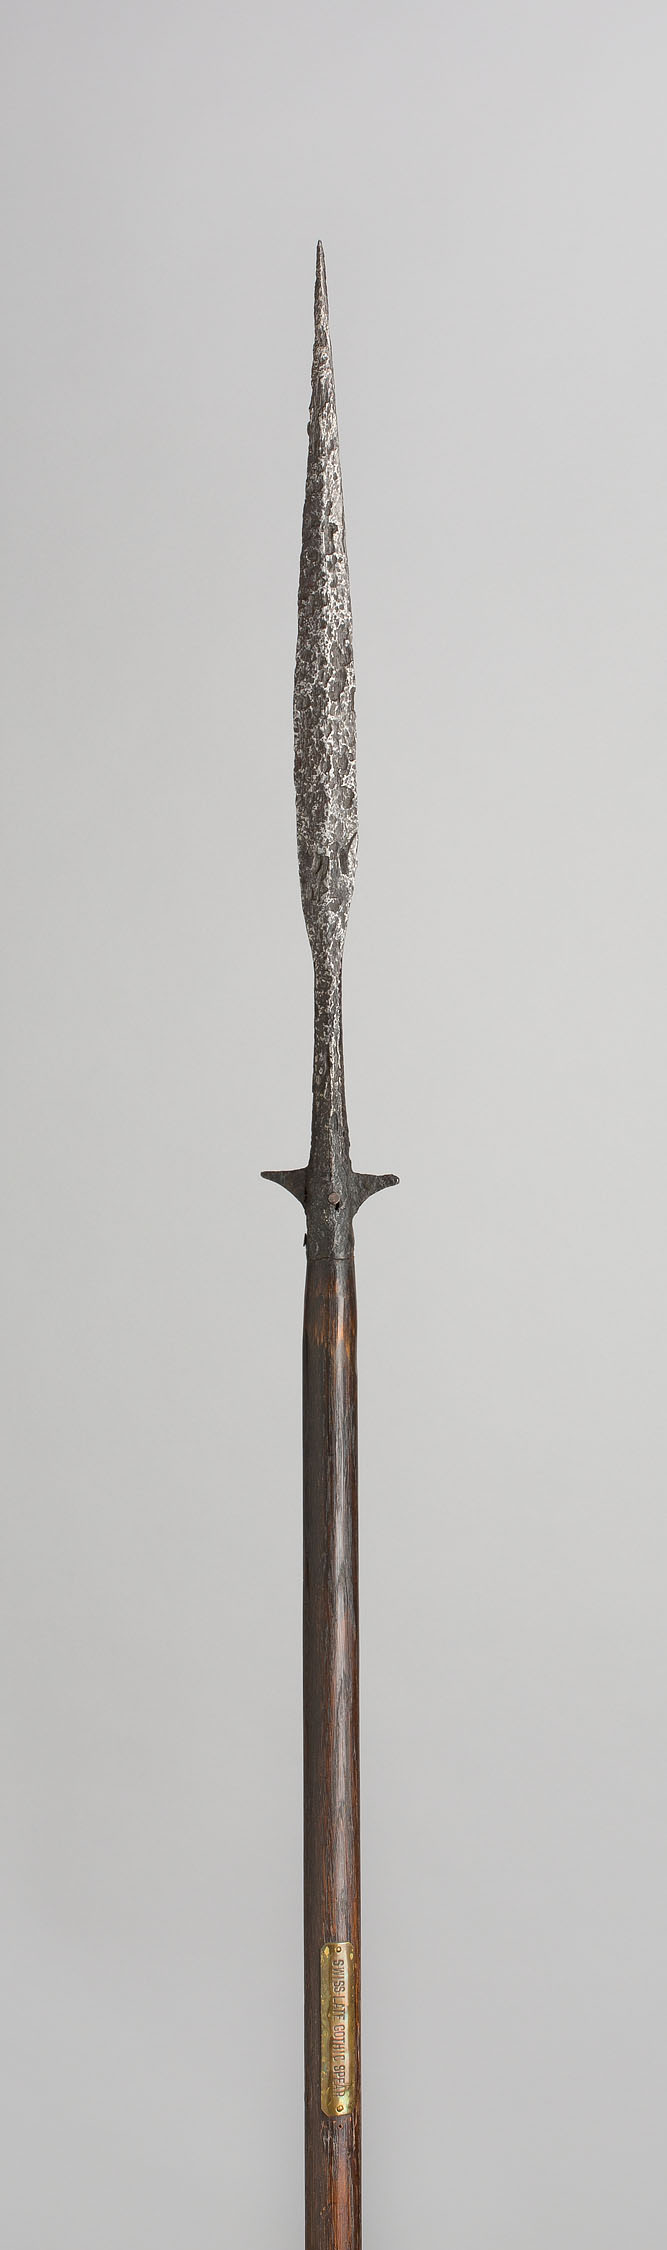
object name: Arms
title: "Eared" Spear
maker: Viking, possibly Swiss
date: 10th/11th century, possibly 13th/14th century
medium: Steel and oak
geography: Switzerland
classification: edged weapon-staff; arms; arms and armor